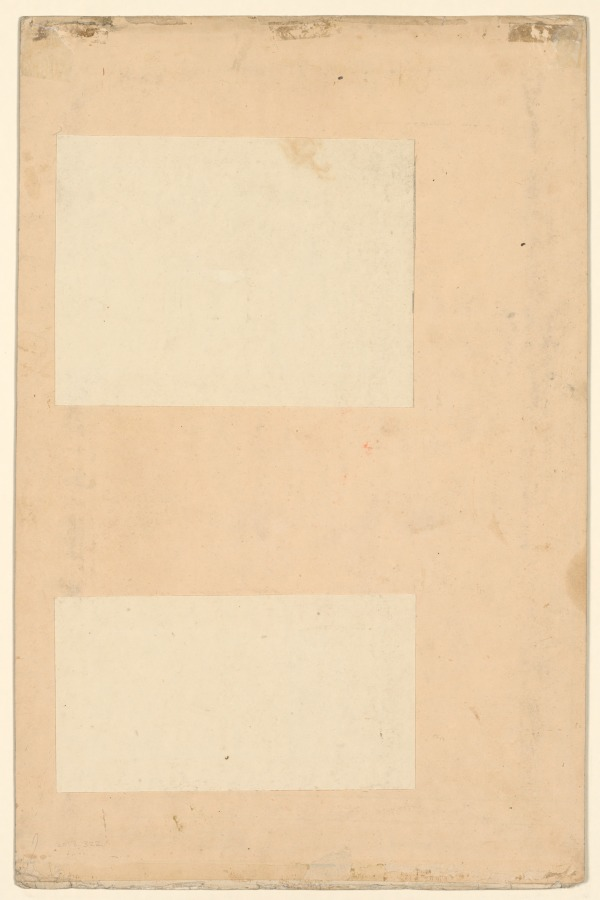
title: A charioteer riding through a rocky landscape with an entourage of footmen and musicians, page from a Razm-nama (Book of Wars) adapted from the Sanskrit Mahabharata and translated into Persian by Mir Ghiyath al-Din Ali Qazvini, known as Naqib Khan (Persian, d. 1614)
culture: India, Mughal, 17th century; made for Abd al-Rahim the Khan Khanan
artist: attributed to Yusuf Ali (Indian, active early 1600s)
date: 1616–17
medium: Gum tempera, ink, and gold on paper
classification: Painting